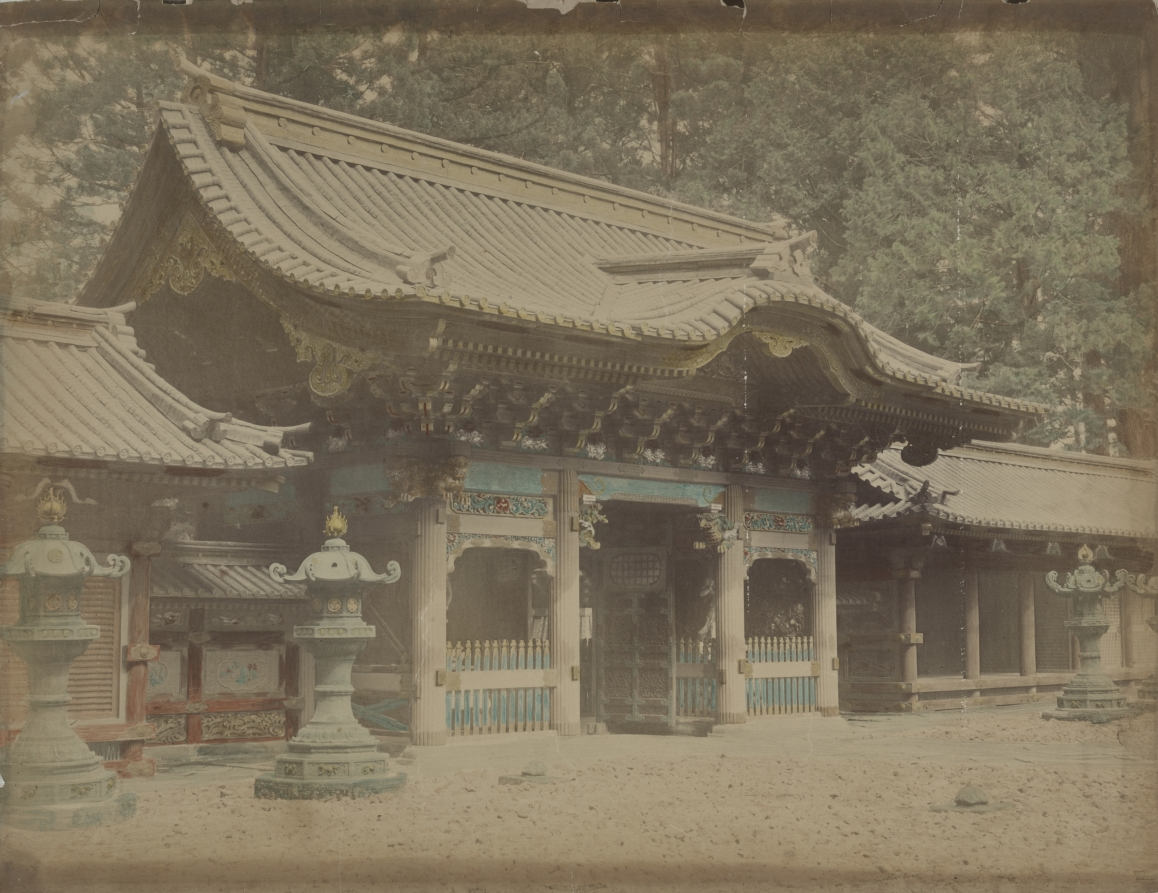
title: Yashamon Gate, Taiyuin Mausoleum, Nikko, Japan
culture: Japan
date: c. 1870s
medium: albumen print from wet collodion negative, hand colored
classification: Photograph